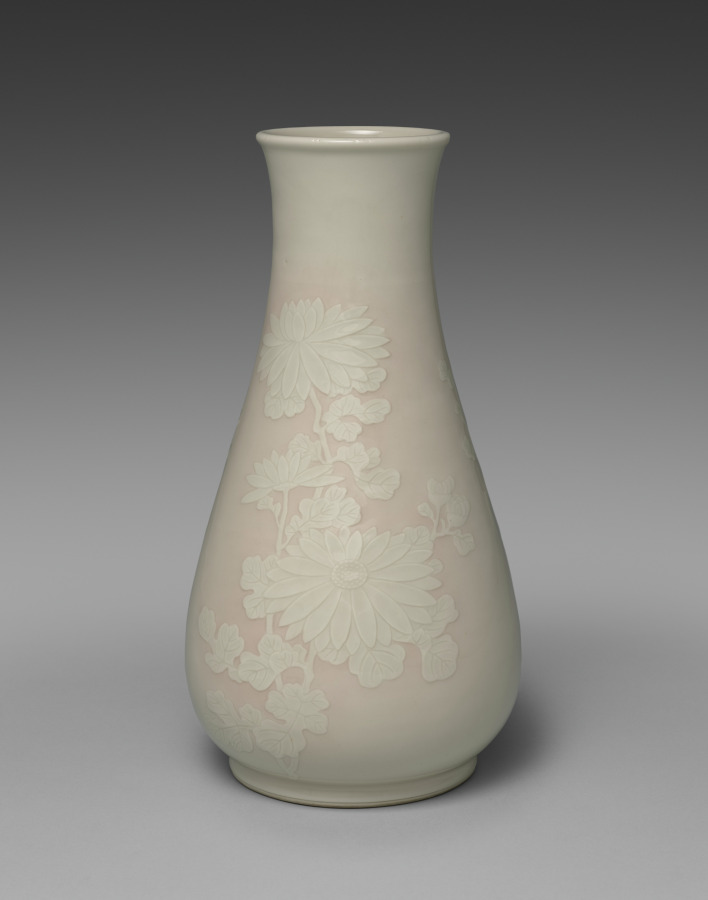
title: Flower Vase with Chrysanthemums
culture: Japan, Meiji period (1868–1912)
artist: Seifū Yohei IV (Japanese, 1872–1951)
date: 1914–46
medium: Porcelain with molded and carved design, underglaze pink, and cream glaze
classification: Ceramic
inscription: 清風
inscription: 清風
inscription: 清風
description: In creating this kanpakuji (or "bright-jewel white porcelain") vase, Yohei IV has applied his father’s signature creamy translucent glaze in combination with underglaze pink gradation surrounding motifs in low relief over an ivory clay body. This method was used to achieve the creamy white of the stalks, leaves, buds, and flowers of the elaborate design of chrysanthemum flowers in diverse stages of bloom.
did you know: The ivory and pink vase by Yohei IV show his father’s “bright-jewel white porcelain” technique.